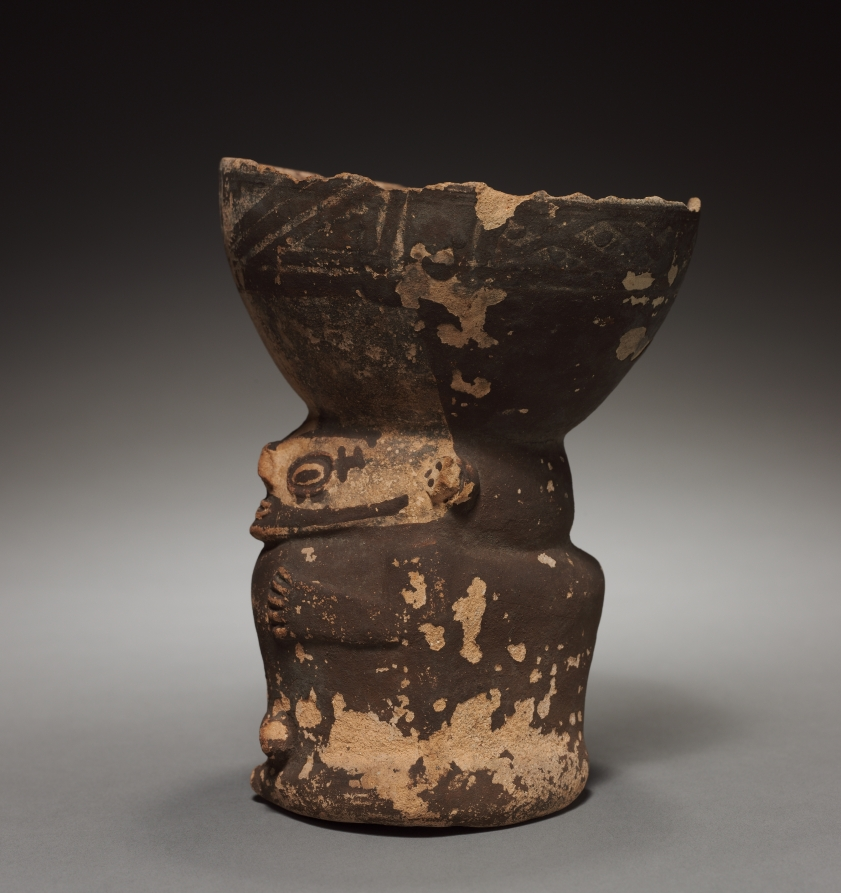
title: Bottle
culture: Peru, Pachacamac, 9th-12th Century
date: 800–1150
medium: pottery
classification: Ceramic